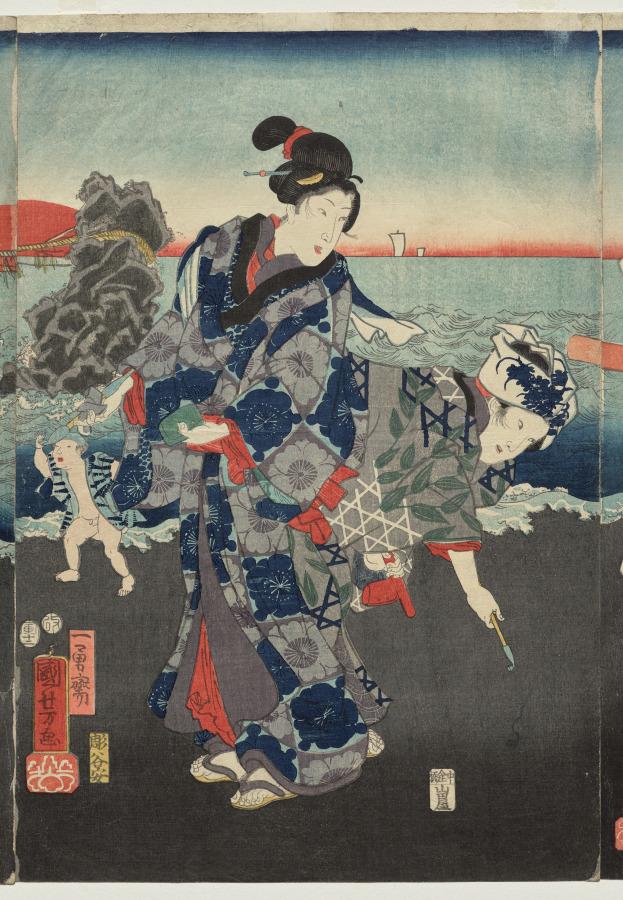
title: Splendid View at Futamigaura Bay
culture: Japan, Edo period (1615–1868)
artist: Utagawa Kuniyoshi (Japanese, 1797–1861)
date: 1854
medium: Center print from a triptych of color woodblock prints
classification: Print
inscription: Signature: Ichiyusai Kuniyoshi ga. Artist Seal: Paulownia. Publisher: Yamadaya Shohei (Nakabashi, emblem). Engraver: Hori Taniyasu. Censorship Seal: aratame.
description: This is one of three prints forming a continuous scene of figures visiting Futamigaura Bay near Ise Grand Shrine, one of Japan’s most sacred places. In the background, the sun rises between the “Wedded Rocks” joined by a twisted rope, called a shimenawa, used to designate a sanctified space. The rocks mark the entrance to Futami Okitama Shrine and are said to be embodiments of Izanagi and Izanami, the gods who, according to myth, created Japan. Futamigaura was a place where pilgrims purified themselves before visiting Ise and often lodged afterward.